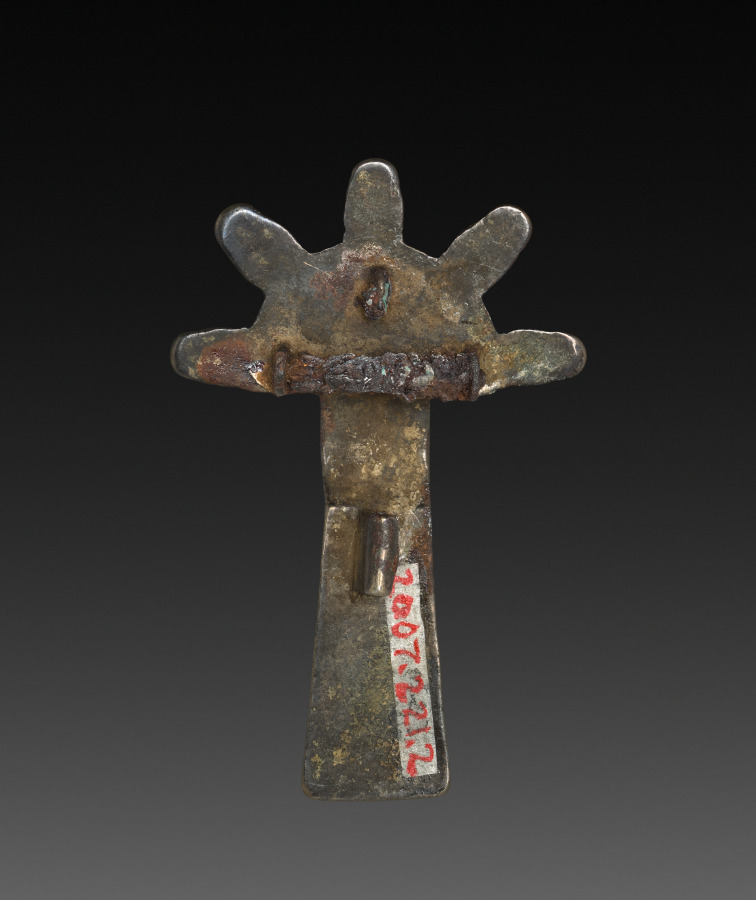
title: Bow Fibula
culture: Alemannic, 6th century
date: 500–550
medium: silver gilt and niello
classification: Jewelry